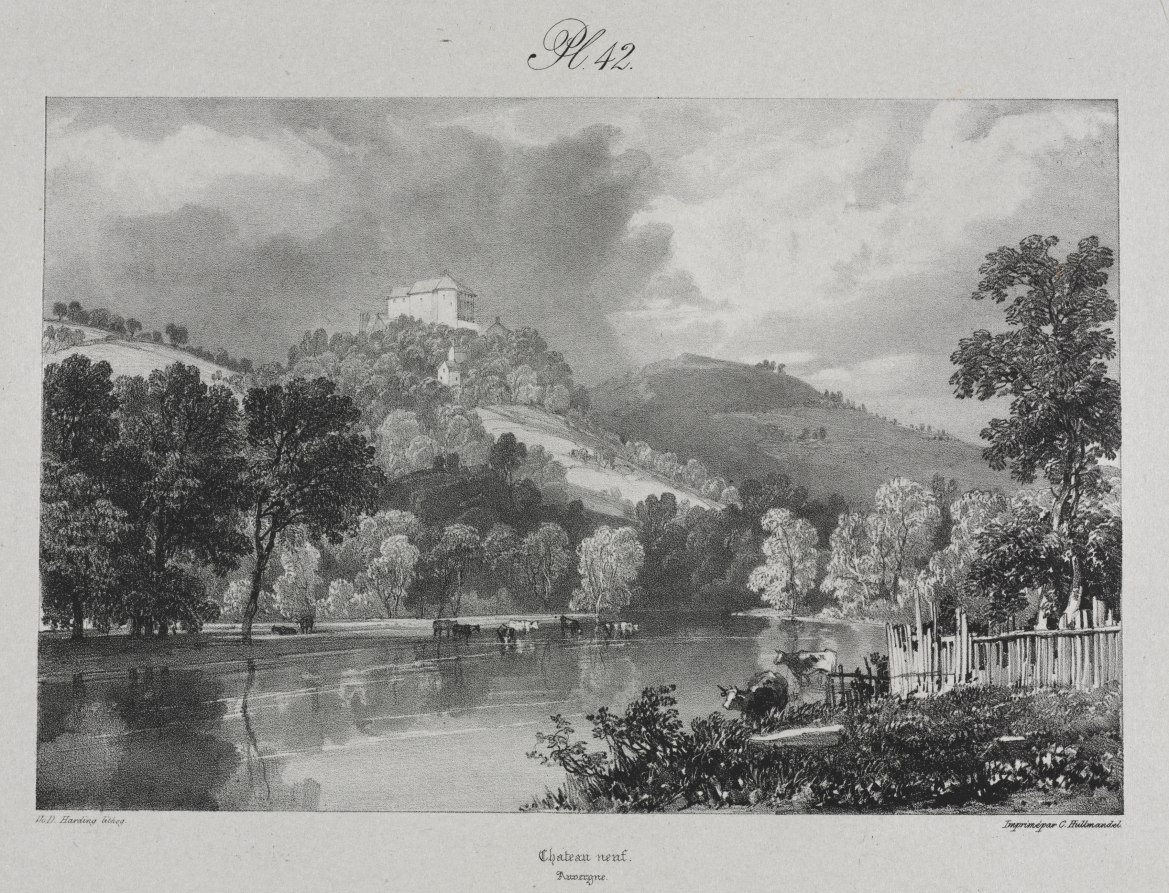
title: Voyages pittoresques et romantiques dans l'ancienne France. Auvergne: Château Neuf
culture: England, 19th century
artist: James Duffield Harding (British, 1798–1863)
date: 1825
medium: lithograph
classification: Print